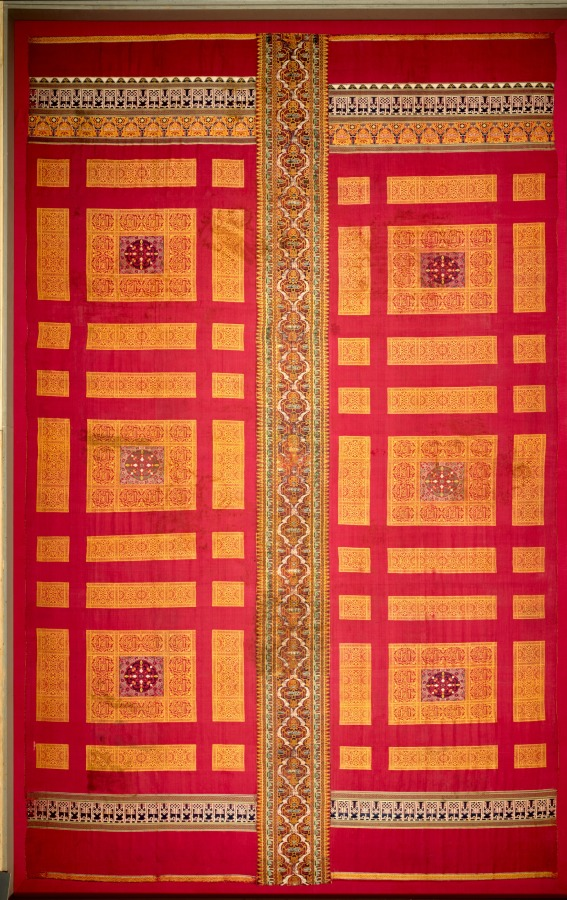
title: Silk curtain from the Alhambra palace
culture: Spain, Granada, Nasrid period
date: 1300s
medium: lampas and taqueté: silk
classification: Textile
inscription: the bold knotted Kufic inscription in the top and bottom borders of the side panels repeats the Arabic word "felicity." Within the arches forming a frieze in the top border is a Kufic inscription "good fortune" and a Naskhi inscription repeating trhe motto of the Nasrid dynasty, "There is no conqueror but God." In the borders of the three large ornamental rectangles on each side panel is the Naskhi inscription "Dominion belongs to God alone." On the central panel the inscriptions in the borders repeat the phrase, "Majestry is God's," while the Nasrid motto, "There is no conqueror but God" and, above, "Blessing," are inscribed in the arabesque ogives.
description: This is one of two of the largest, most complete, and most ornate curtains to survive from the 1300s when it presumably hung in the royal Alhambra Palace in Granada, the last Muslim stronghold in Spain. Its style, artistic vocabulary, and harmonious proportions reflect the magnificent wall decoration in the Alhambra. The motto of the ruling Nasrid dynasty, "There is no conqueror but God," is inscribed in the end borders and central panel. The inscribed striped silk forming the central panel is more worn, suggesting that it was recycled, most likely during the 1300s.